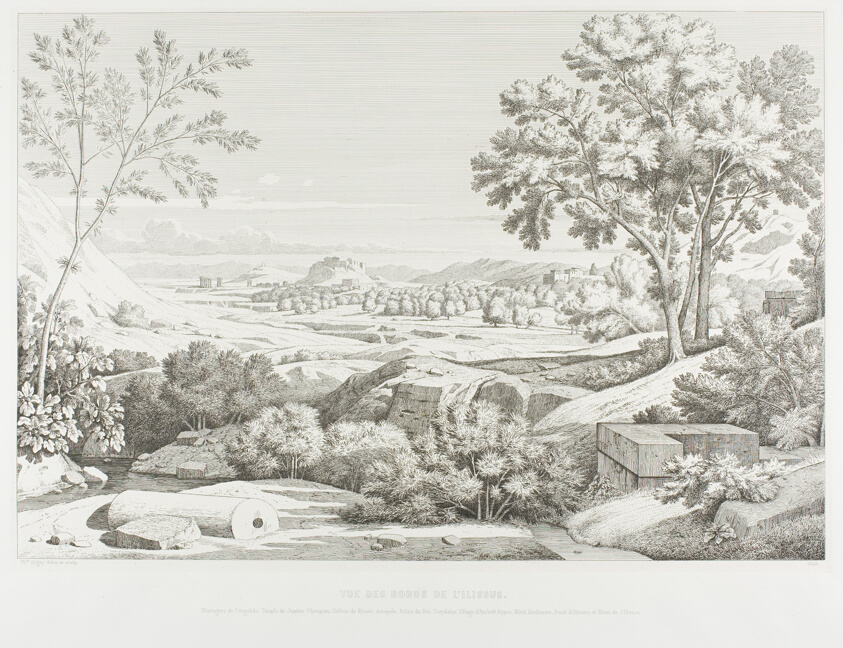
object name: Print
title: View from the Banks of the Illisós: Mountains of the Argolid, Temple of Olympic Jupiter, the Acropolis, Palace of King Corydalus, Village of Ambelo'kypos, Mount Anchesmos, Forest of Olives and the River Illisós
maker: Théodore Caruelle d'Aligny; French, 1798-1871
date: 1846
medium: Etching on ivory China paper, laid down on white wove paper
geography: France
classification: etching; print; prints and drawing